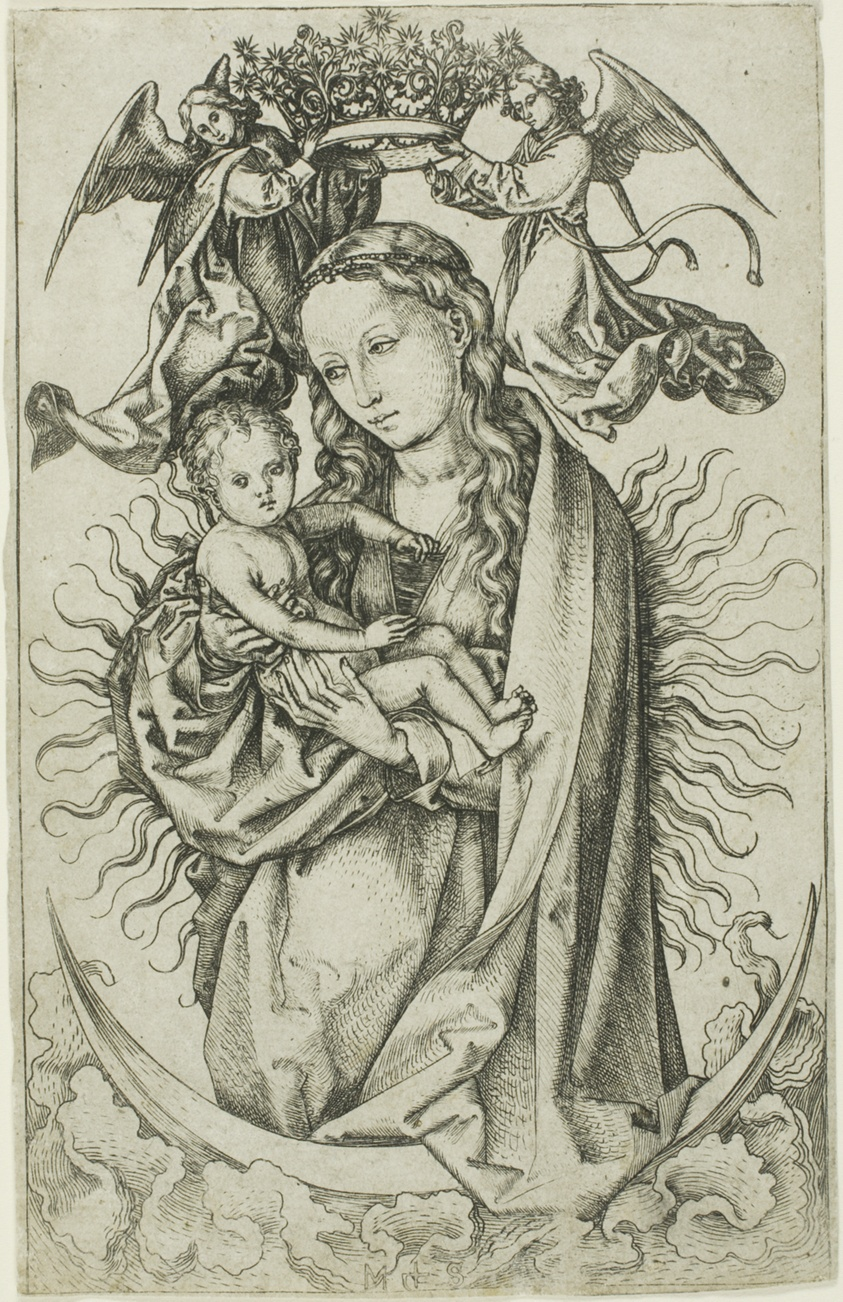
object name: Print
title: The Madonna on the Crescent Crowned by Two Angels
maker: Martin Schongauer (German, c. 1430/50-1491)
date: 1470–75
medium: Engraving in black on buff laid paper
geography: Germany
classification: engraving; print; prints and drawing